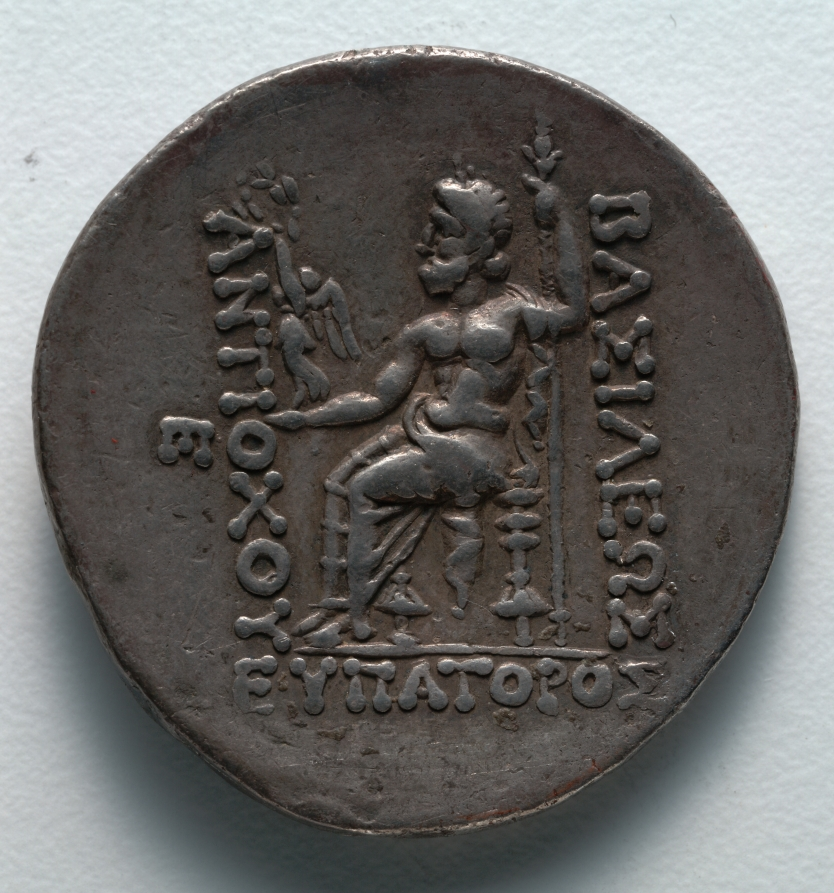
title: Tetradrachm: Zeus Nikephoros (Seated, Holding Nike) (reverse)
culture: Greek, Seleukid, minted at Antioch (Syria), reign of Antiochos V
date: 164–162 BCE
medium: silver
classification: Coins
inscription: ΒΑΣΙΛΕΩΣ | ΑΝΤΙΟΧΟΥ | ΕΥΠΑΤΟΡΟΣ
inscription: Τ within Π